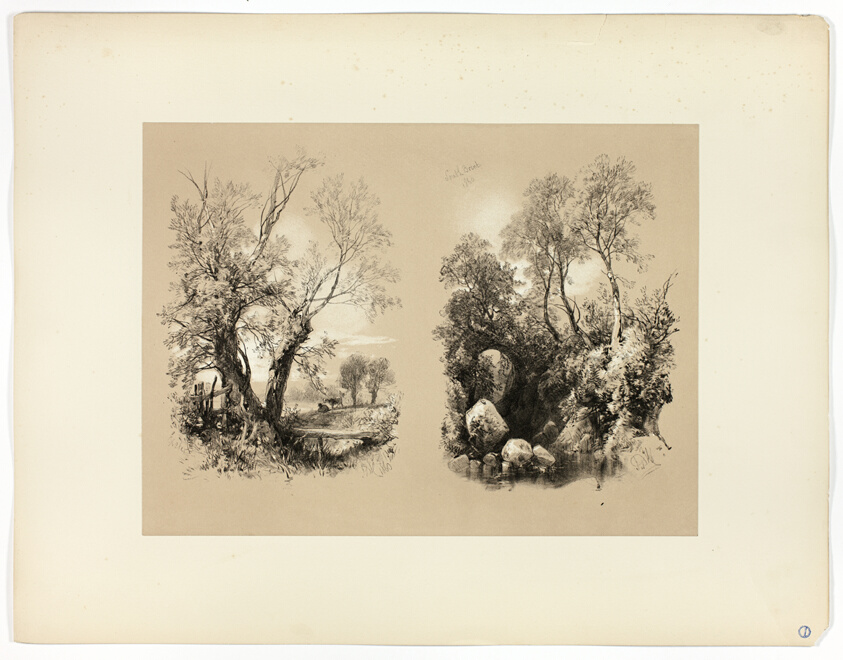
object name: Print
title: South Brent, from Picturesque Selections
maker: James Duffield Harding, (English, 1798-1863); Published by W. Kent and Co.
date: 1860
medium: Lithograph on paper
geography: England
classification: lithograph; print; prints and drawing